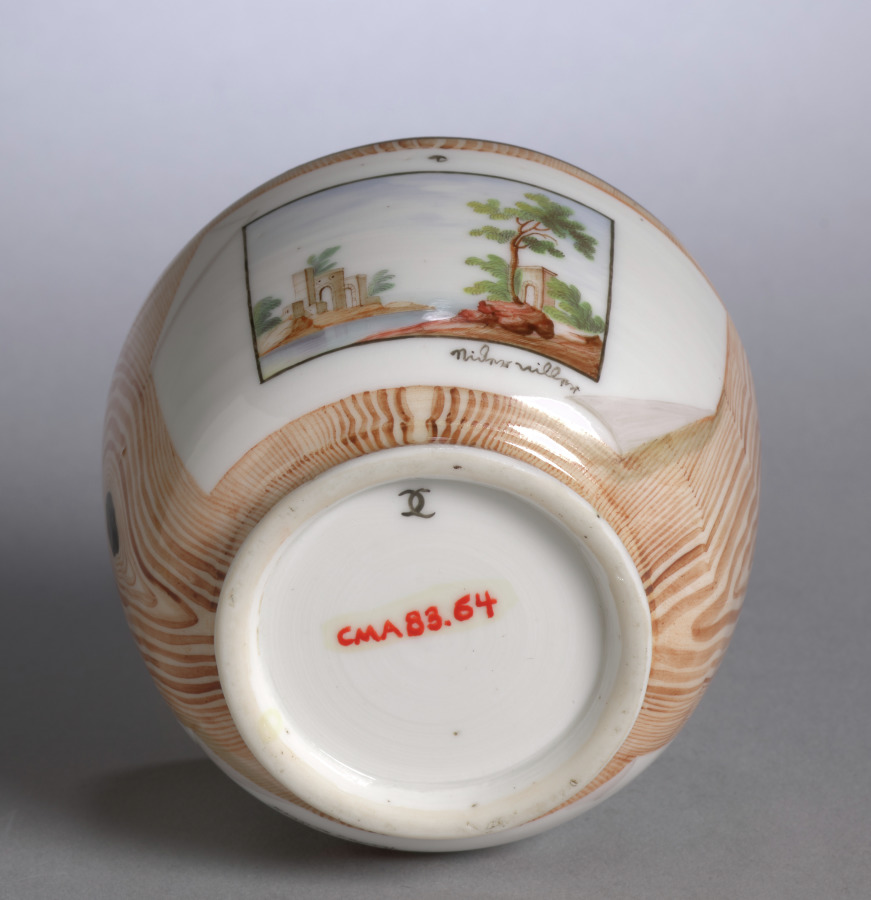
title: Bowl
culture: France, 18th century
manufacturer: Niderviller Factory (French)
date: c. 1780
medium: porcelain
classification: Ceramic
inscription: inscribed at lower right corner of two trompe l'oeil prints: Niderviller.